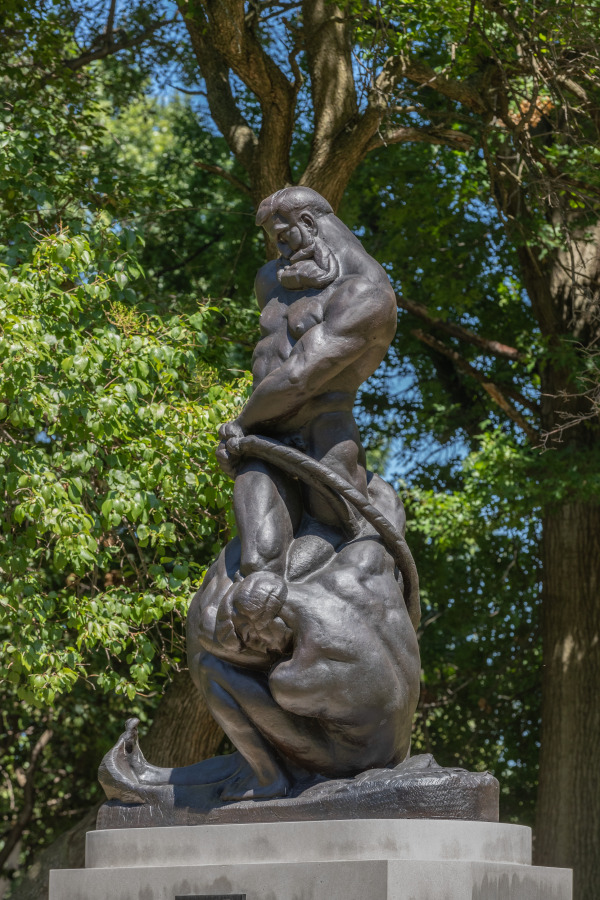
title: The City Fettering Nature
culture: America, Ohio, Cleveland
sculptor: Alexander Blazys (American, born Russian Empire [now Lithuania], 1894–1963)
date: 1927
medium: bronze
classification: Sculpture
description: Alexander Blazys, a Lithuanian immigrant, became a leading sculptor in Cleveland during the 1920s, when he created The City Fettering Nature for the Cleveland Museum of Art’s grounds. In this composition, Utility and Beauty, two characteristics of the city, are shown as intertwined figures attempting to subdue Nature’s power. The brawny figure of Nature, still standing despite this attack, struggles to free himself from the restraints.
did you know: This monumental bronze sculpture weighs 1,500 pounds and requires a crane to install.